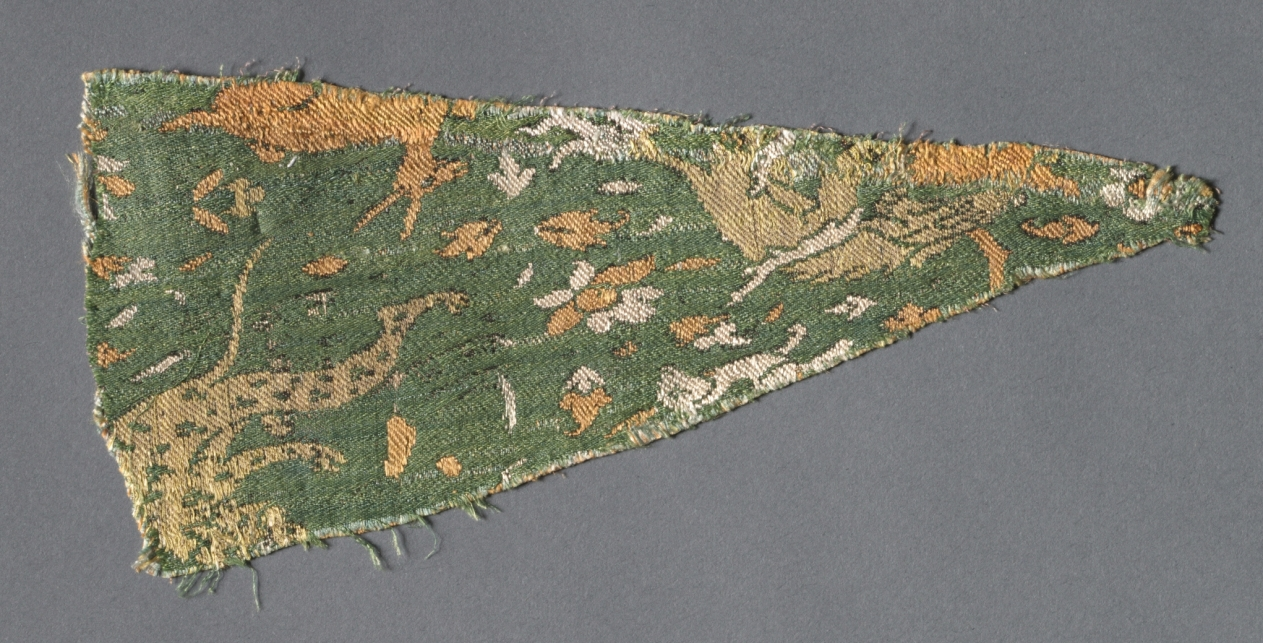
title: Lampas with scenes of wild animals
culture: Iran, Safavid period (1501–1722)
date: 1500s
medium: silk and gold: lampas weave, brocaded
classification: Textile